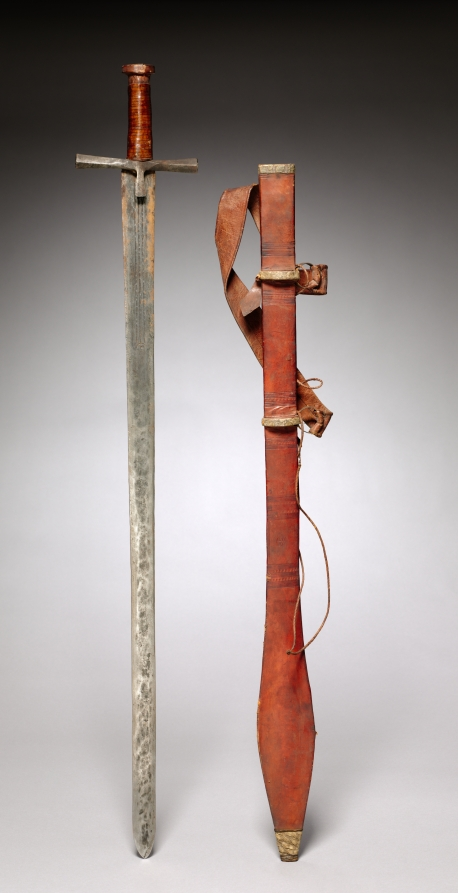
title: Sword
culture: Africa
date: 1900s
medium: Iron, leather, wood, metal, and plant fiber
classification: Arms and Armor